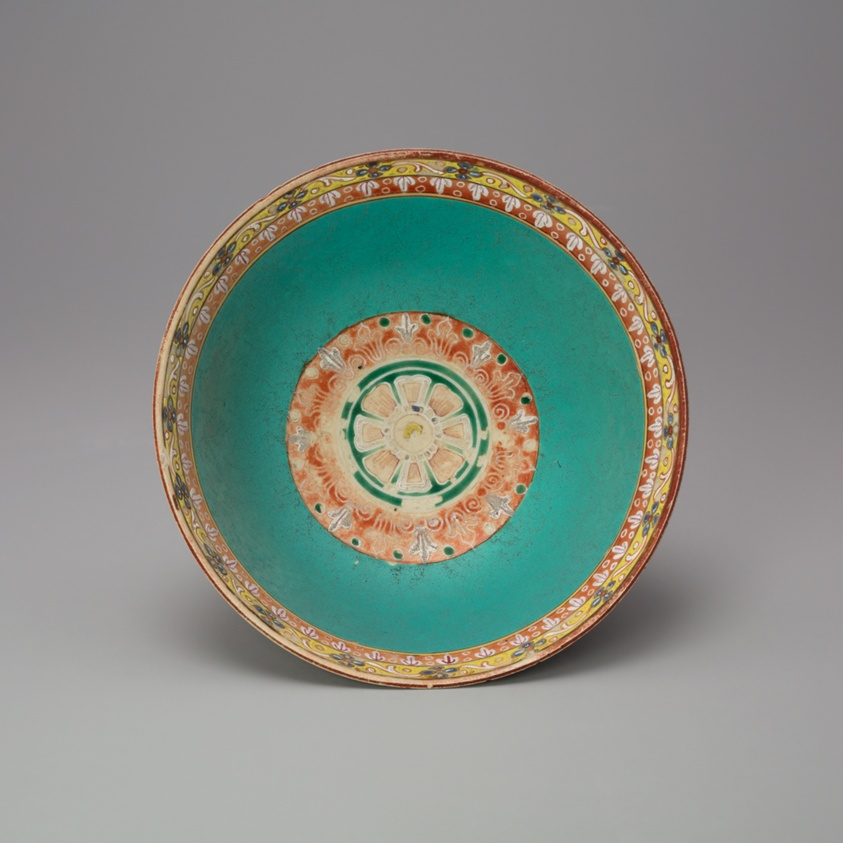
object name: Vessel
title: Bencharong (Five-Colored) Ware, Bowl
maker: China, for the Thai Market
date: 19th century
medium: Porcelain painted in overglaze polychrome enamels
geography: China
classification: porcelain; asian art; ceramics; vessel